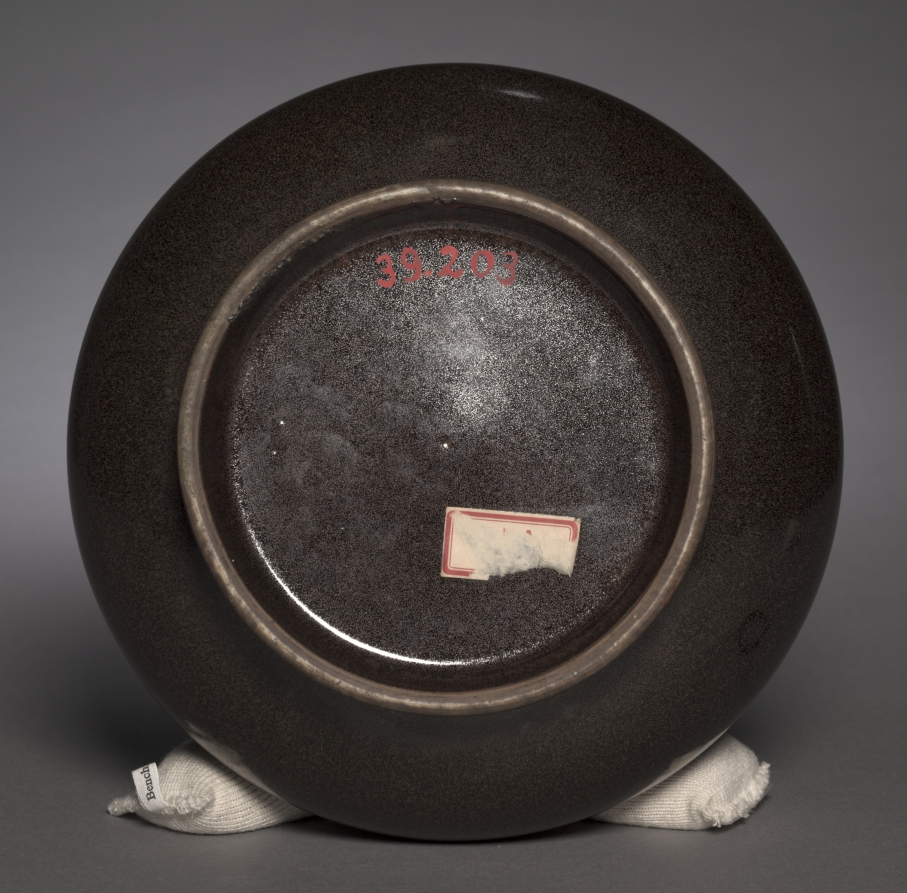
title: Vase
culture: China, Qing dynasty (1644–1911), Qianlong reign (1736–95)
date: 1736–95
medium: porcelain with dark brown glaze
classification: Ceramic